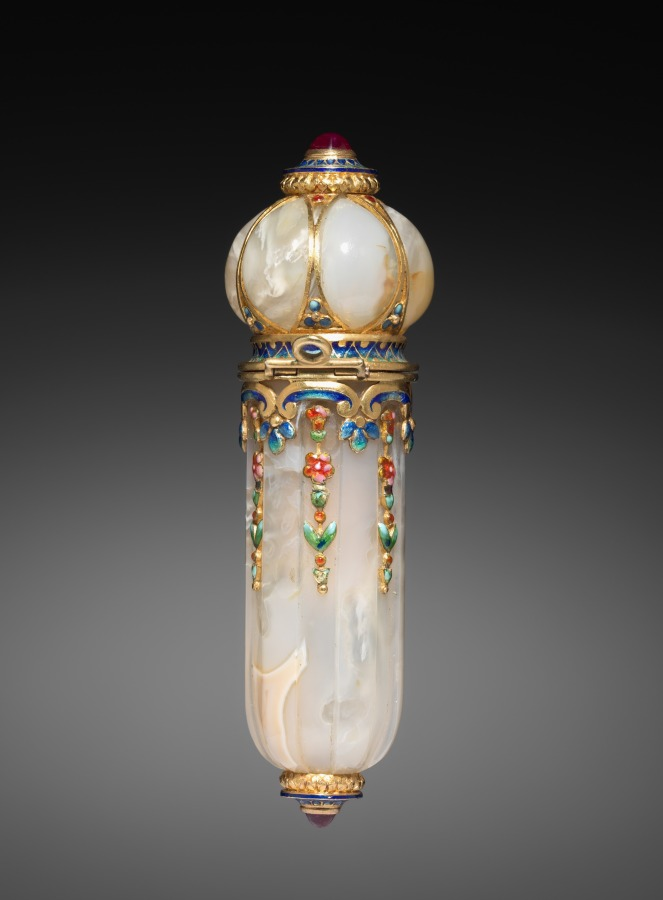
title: Perfume Vial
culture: France, Paris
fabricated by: Tecla Firm (French)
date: c. 1900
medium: agate with enamel, gold, rubies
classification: Miscellaneous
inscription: "Tiffany & Co." engraved at edge of top.